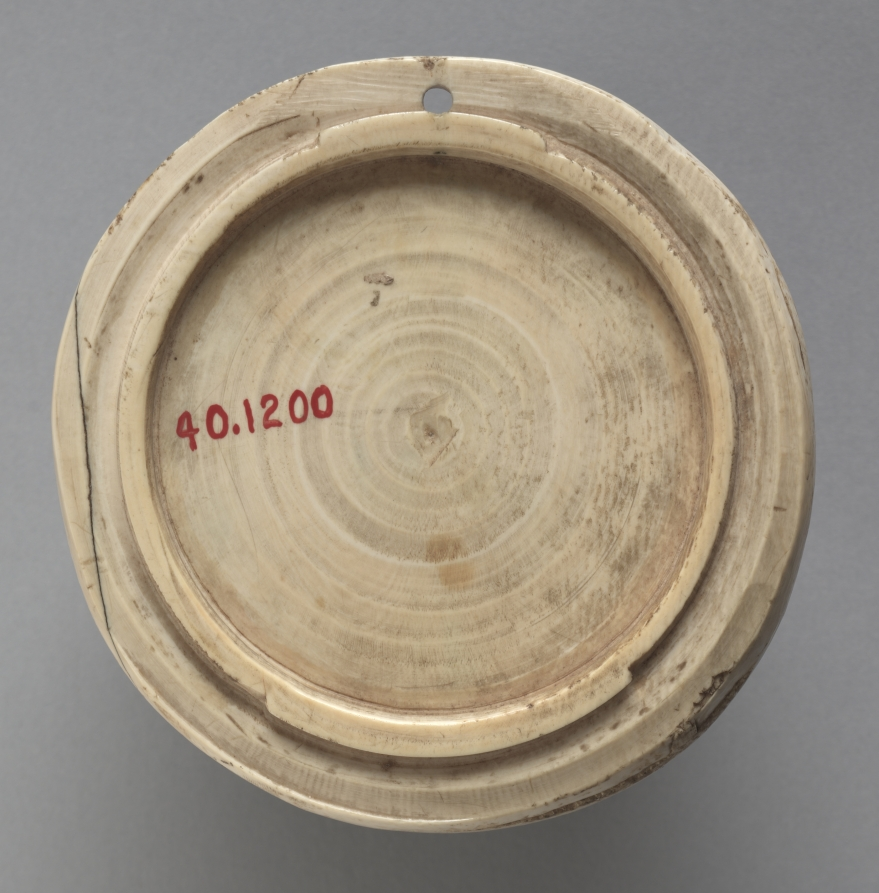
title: Mirror Case with a Couple Playing Chess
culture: France, Paris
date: 1325–50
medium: ivory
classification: Ivory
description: During the 1300s, elephant ivory was valued by courtly patrons as the most exquisite material for indicating the human form. At this time Paris was the center of production for luxury ivories like the example seen here. They were much sought after by members of the court and aristocracy as emblems of wealth and status and signifiers of fashion and taste. This ivory, once forming a mirror back, depicts a man and woman engaged in a game of chess, a popular game at the time representing both love and war in medieval iconography. Various suggestions have been proposed for the identity of the couple—Tristan and Iseult or Lancelot and Guinevere—without certainty. Mirror backs survive in large numbers from the 1300s and typically depict amorous encounters or chivalrous behavior. They were produced for a secular clientele steeped in romantic literature and with an appetite for luxury objects.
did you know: Chess was a wildly popular pastime among the nobility, and was also an important element in medieval romantic literature. Who do you think is winning this game?